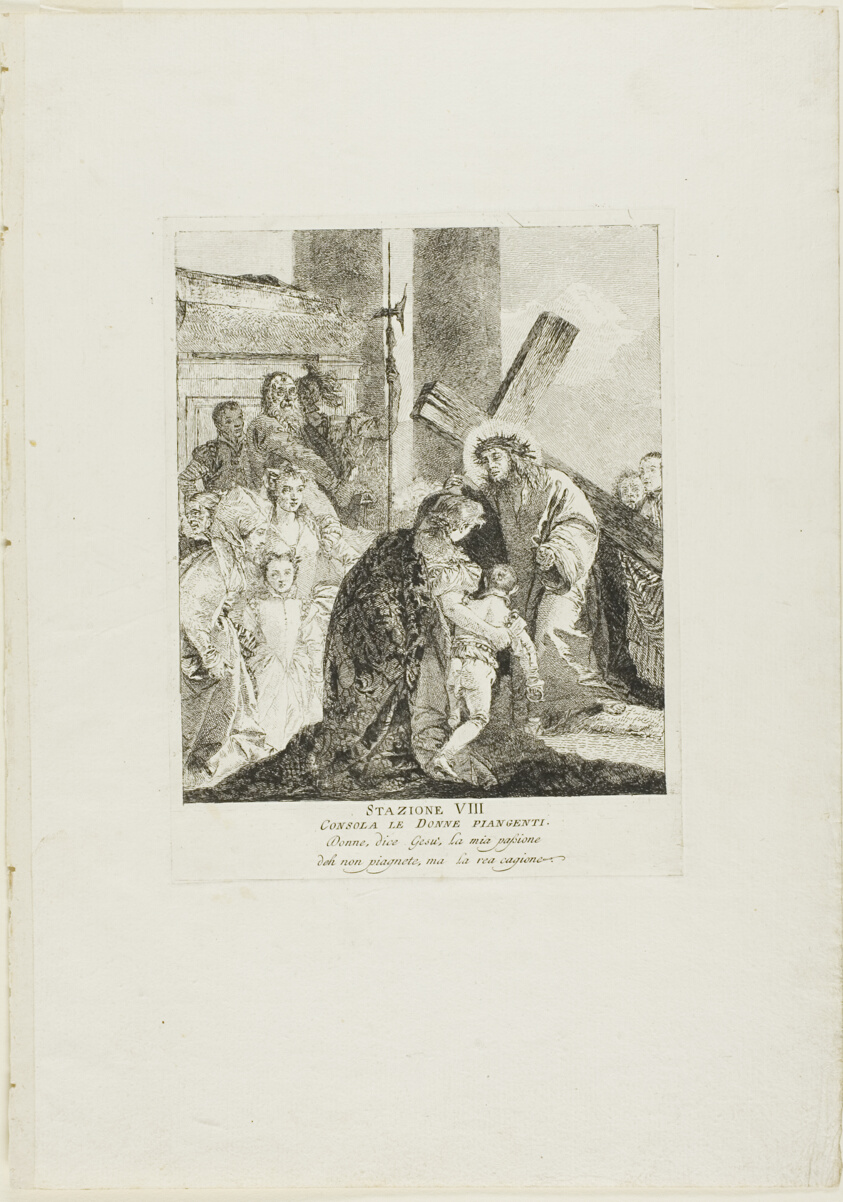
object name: Print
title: Christ Consoles the Weeping Women, plate eight from Stations of the Cross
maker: Giovanni Domenico Tiepolo (Italian, 1727-1804)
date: c. 1748, published 1749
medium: Etching on paper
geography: Italy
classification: etching; print; prints and drawing